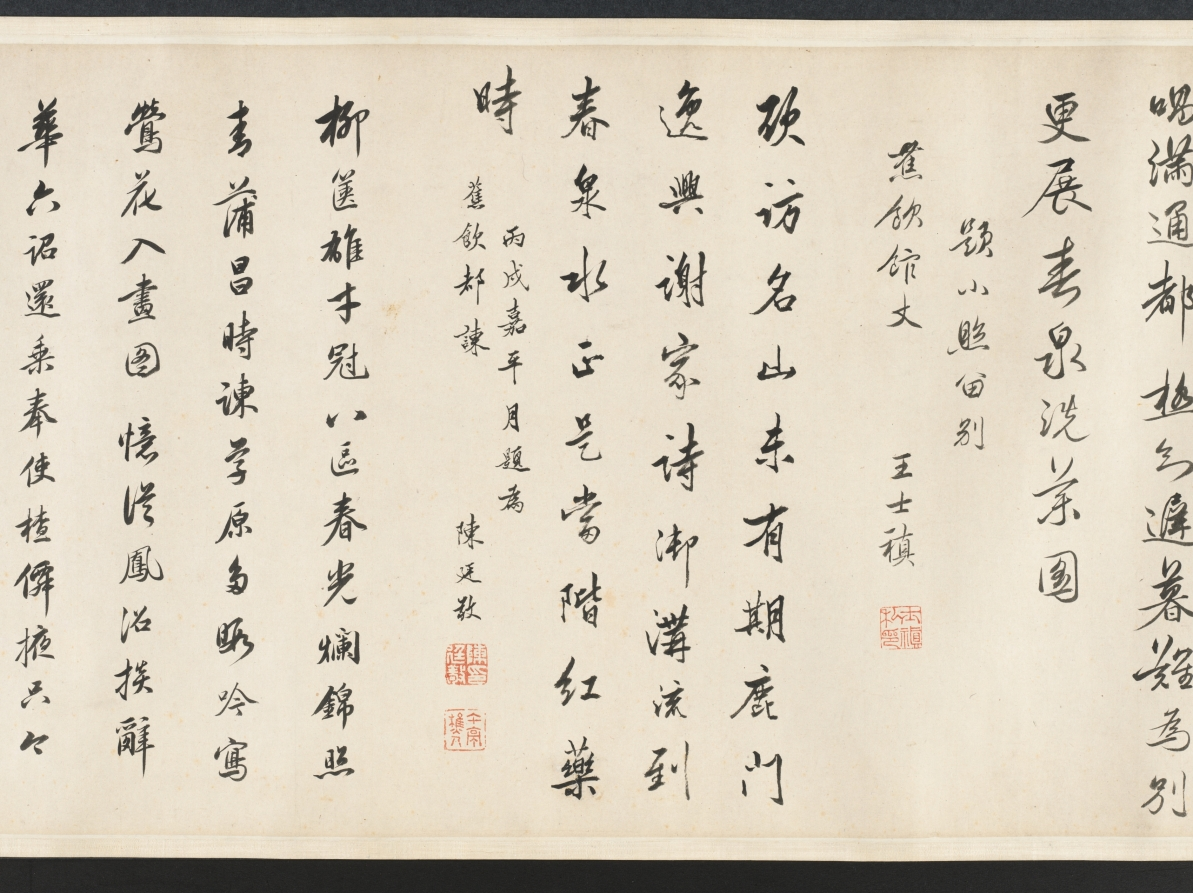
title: Cleansing Medicinal Herbs in the Stream on a Spring Day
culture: China, Qing dynasty (1644-1911)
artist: Yu Zhiding (Chinese, 1647–c. 1716)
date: 1703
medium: Handscroll; ink and color on silk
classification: Painting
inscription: Title by Chen Yixi.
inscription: 姑射仙人冰雪膚，新詩傳唱滿通都。/ 極知遲暮難為別，更展春泉洗藥圖。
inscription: Colophon by Chen Tingjing 陳廷敬 (1639–1712). Colophon by Wang Hongxu 王鴻緒 (1645–1723), dated 1707. Colophon by Song Luo 宋犖 (1634–1714). Colophon by Liu Yan 劉巗. Colophon by Jing Xikui 涇西夔. Colophon by Liu Yan 劉巗. Colophon by Cao Yin 曹寅. Colophon by Wang Shihong 汪士鋐. Colophon by Wang Shidan 王式丹 (1645–1718), dated 1712. Colophon by Shi Shenyi 史申義 (1661–1712), dated 1712. Colophon by Yin Yuqing 殷餘慶, dated 1712.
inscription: Colophon by Chen Shixia 陳時夏, dated 1729.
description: A famous portraitist, Yu Zhiding here depicts the likeness of Shi Shenyi 史申義 (1661–1712), an official and poet. Master Shi, a sickly man, was deeply interested in medicinal science. The opening section of the scroll features a boy washing a fungus in fresh spring water, a basket of medicinal herbs by his side. Other servants carry a fan, a bundle of scrolls, and a cup of tea or hot wine. Master Shi sits in a bamboo grove, surrounded by fields of herbs. Returning swallows, pink peach blossoms, and blooming magnolia indicate spring, whereas the fungus conveys wishes for long life. The spring theme may express the artist’s wish for his friend’s recovery.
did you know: In the pavilion are some of Shi Shenyi’s scholarly accoutrements: a stack of books, an antique zun 尊 (wine vessel), a brush holder, an ink stone, and a small chime.